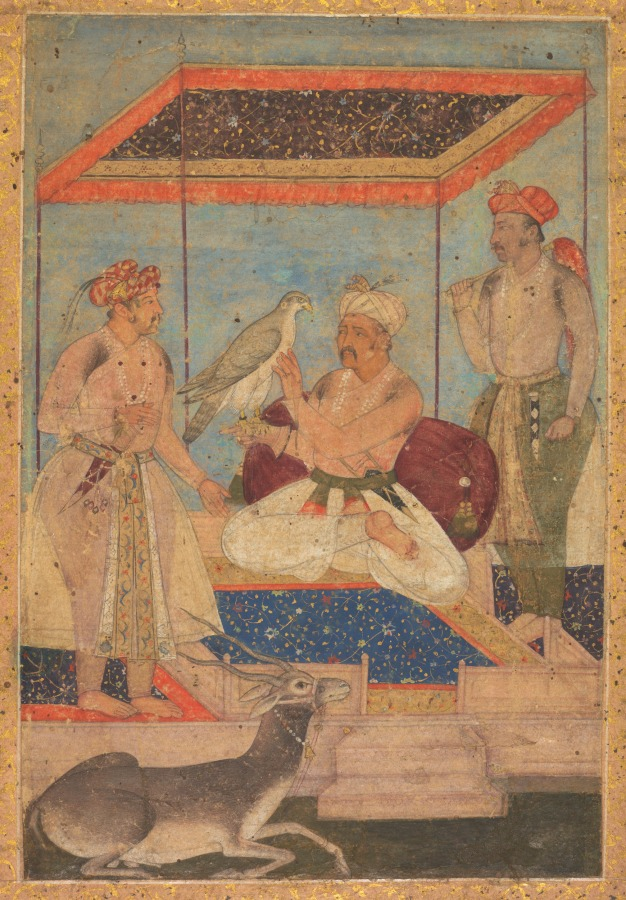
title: Akbar and Jahangir Examine a Ghir Falcon while Prince Khusrau Stands Behind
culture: Mughal India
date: c. 1602–4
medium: gum tempera and gold on paper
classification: Painting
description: Emperor Akbar sits against a purple bolster under a canopy looking aged and careworn, probably not long before his death. He examines a trained falcon of the type that the Mughals used in hunting. This falcon appears to be from Akbar’s son, Prince Salim, who stands before him in a gesture of gift-giving. A stately black antelope, a wild animal now a pet, harnessed and wearing a bell, crouches at the foot of the steps leading up to the canopied platform.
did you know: Salim rests his hand on a sharply pointed dagger in a red velvet sheath.